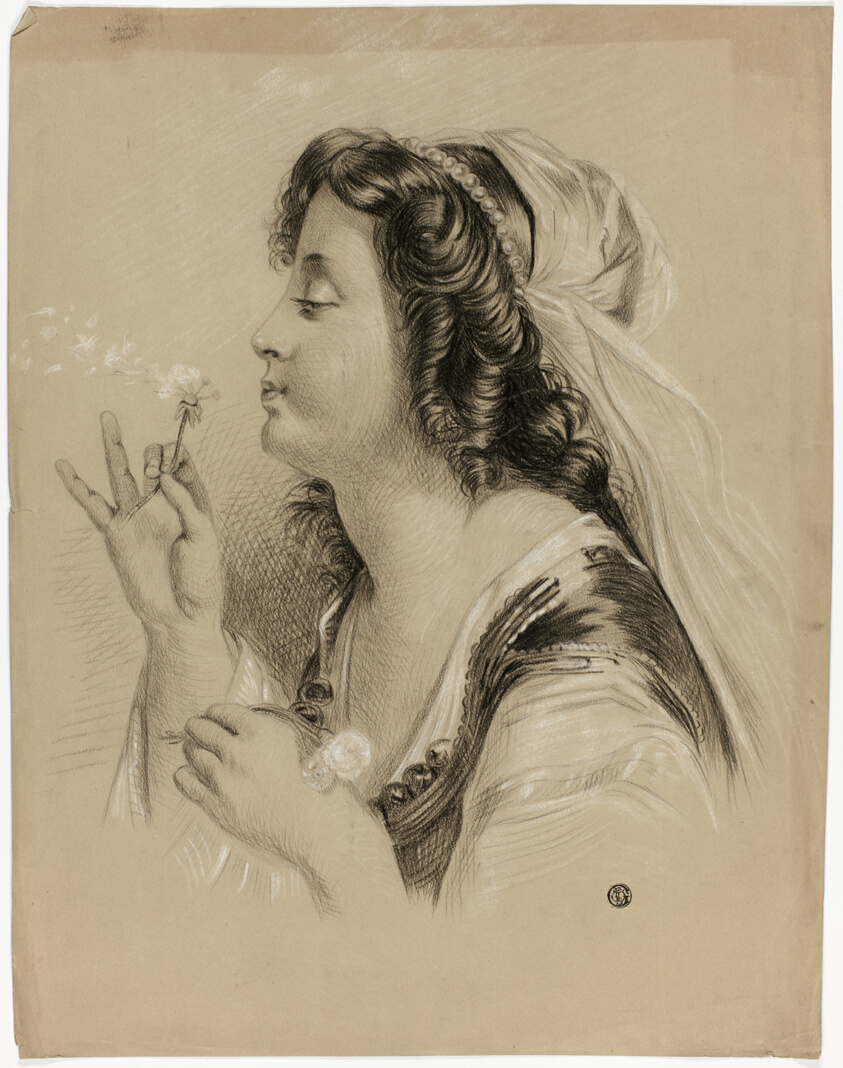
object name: Drawing and Watercolor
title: Girl Blowing on a Dandelion (recto); Profile Head of a Girl (verso)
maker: Unknown Artist; European, 19th century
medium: Black crayon, heightened with white chalk (recto), and graphite (verso), on tan wove paper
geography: Europe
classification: crayon; paper; drawings (visual works); prints and drawing